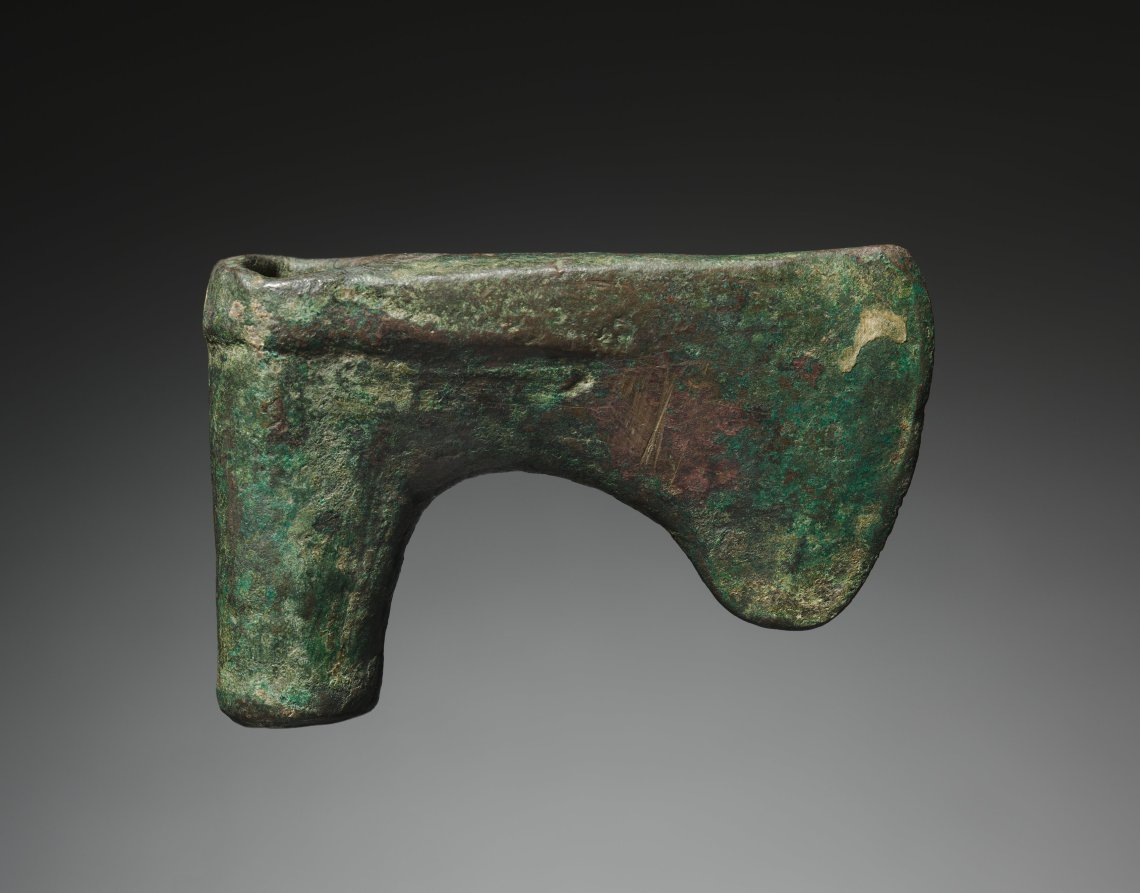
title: Domestic Axe-Head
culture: Iran, Luristan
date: 2000–1000 BCE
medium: bronze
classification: Metalwork